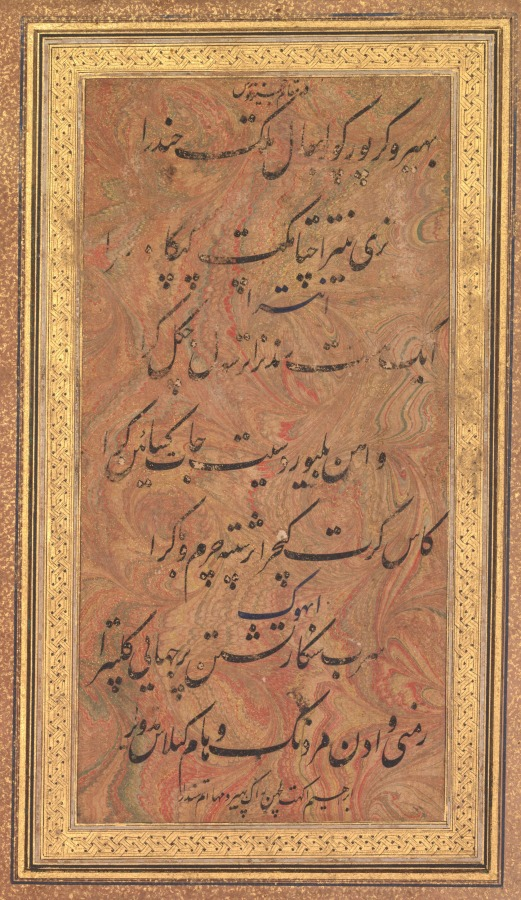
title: Eight Lines of Musical Poetry of the Jajner Nauras (Rag Bhairav) of Ibrahim Adil Shah of Bijapur (verso)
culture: Southwestern India, Karnataka, Bijapur, 17th century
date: late 1600s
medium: Gum tempera, ink, and gold on paper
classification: Calligraphy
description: Ibrahim Adil Shah II was a visionary ruler in the southern territories of the Deccan between 1580 and 1627 with his court based in the city of Bijapur. He maintained independence from Mughal encroachments from the north and fostered a distinctive culture infused with mystical Sufi ideals and a distinctive blending of Hindu and Islamic elements. This work of calligraphy is a verse composed by Ibrahim Adil Shah II that exemplifies his love of music and poetry. Normally a Hindu court tradition, ragamalas, or musical modes, were recast by Ibrahim Adil Shah in the local Dakhini language and incorporated into his Islamic milieu. The spectacular marbling on which the verse is written in Arabic script is a characteristic of the Deccan, where marbling was prized for its mysterious and random beauty. Mounted on an imperial Mughal album page with an image of the Hindu ruler Ram Singh on the verso, the placement of this Deccani calligraphy may have functioned as a tribute to Ram Singh’s father, who served the Mughal emperor in the Deccan from 1659 until 1666.